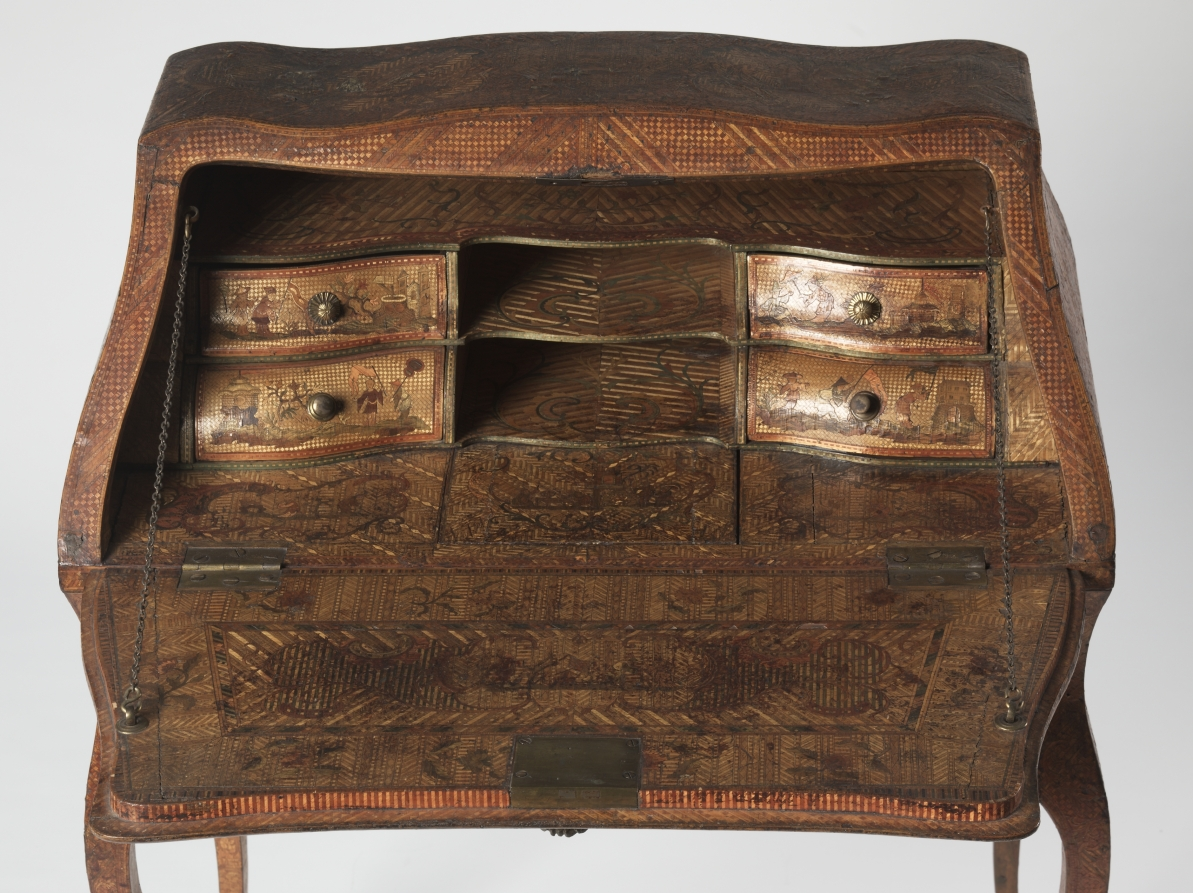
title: Ladies Writing Desk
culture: Possibly Northern Italy, near France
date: c. 1750–75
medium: Oak with straw marquetry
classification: Furniture and woodwork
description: As early as the beginning of the 17th century, straw marquetry was being produced throughout Europe. Along with cabinetmakers and specialized artisans, creators of straw marquetry included home artisans, nuns, monks, and noble dilettantes. Thus the quality and design of objects using straw marquetry is quite diverse. While some pieces appear nearly naive, others are made very masterfully, such as with this ladies writing desk. Some of these objects were even presented in royal cabinets of wonder. Because of its silky gloss and bright colors, straw marquetry was held in great esteem as unusual and remarkable decoration for furniture and other objects on par with gemstones, tortoiseshell, or ivory.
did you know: The surface of this ladies writing desk is completely covered with straw marquetry decoration both outside and in.